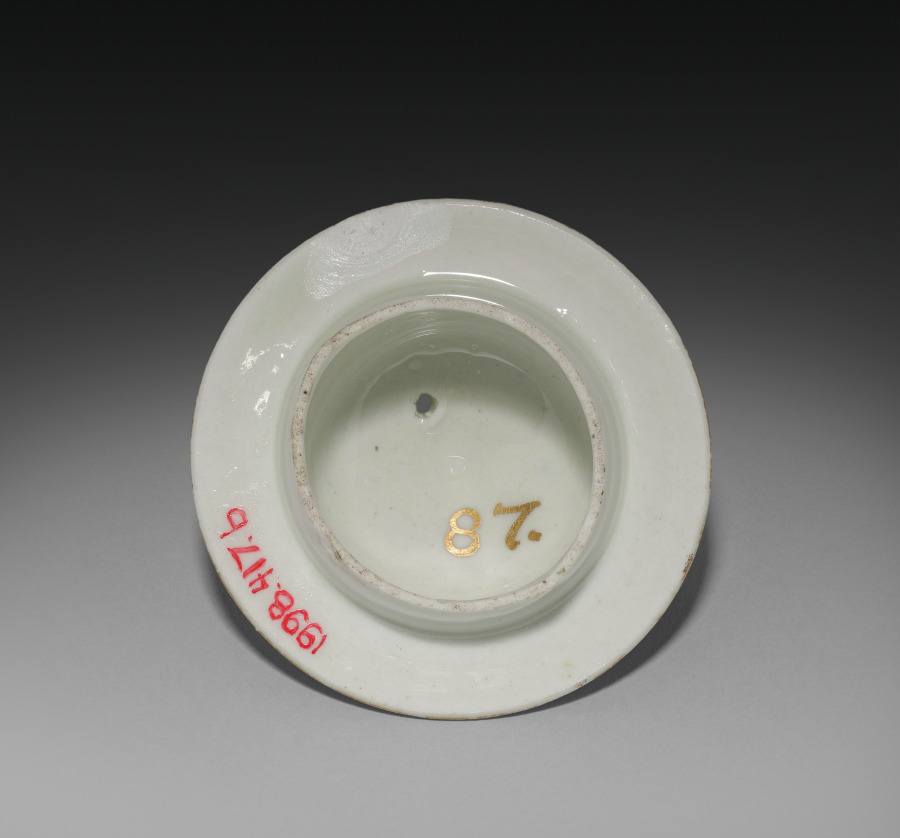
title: Tea Pot (lid)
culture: Germany, Meissen, 18th century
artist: Meissen Porcelain Factory (German, est. c. 1710)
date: c. 1723–24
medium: gilt porcelain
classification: Ceramic